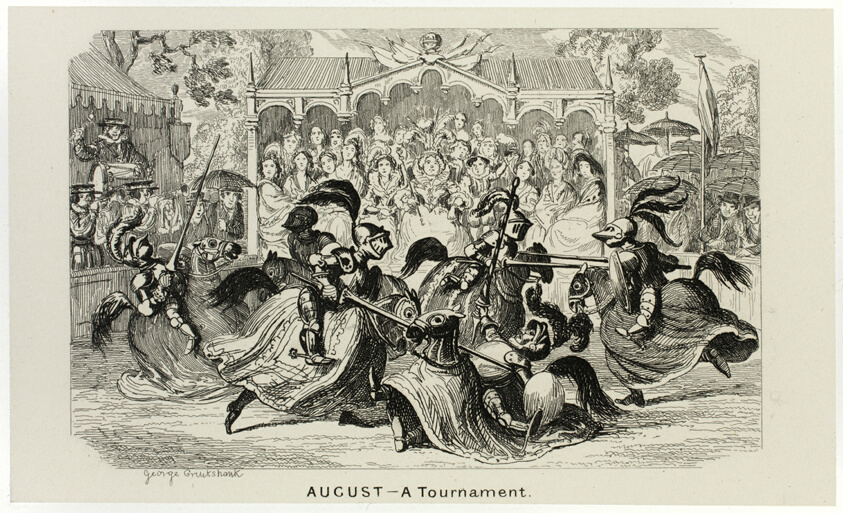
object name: Print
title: August - A Tournament from George Cruikshank's Steel Etchings to The Comic Almanacks: 1835-1853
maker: George Cruikshank (English, 1792-1878); published by Pickering & Chatto (English, 19th century)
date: 1840, printed c. 1880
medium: Steel etching in black on cream India paper, laid down on off-white card (chine collé)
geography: England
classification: etching; paper; steel; print; prints and drawing